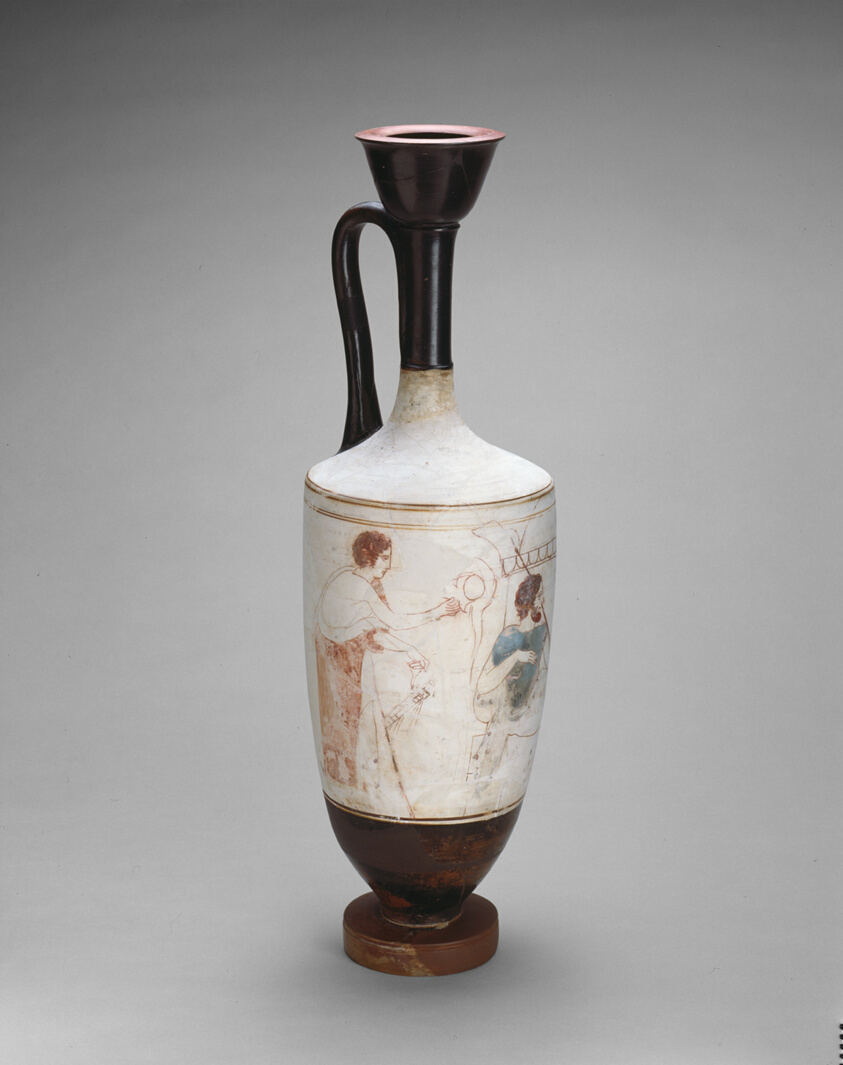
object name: Funerary Object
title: Lekythos (Oil Jar)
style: high classical, Classical, attic, white-ground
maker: Attributed to the Reed Painter; Greek; Athens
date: 410-400 BCE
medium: terracotta, white-ground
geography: Athens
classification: vessel; earthenware; ceramics; ancient art